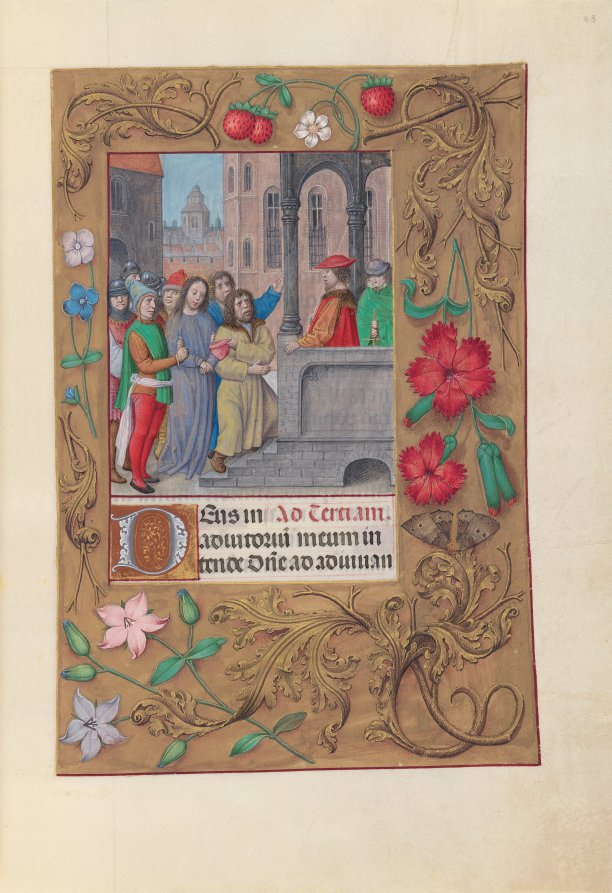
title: Hours of Queen Isabella the Catholic, Queen of Spain: Fol. 63r, Christ before Pilate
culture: Flanders, Ghent and Bruges, late 15th century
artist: Master of the First Prayerbook of Maximillian (Flemish, c. 1444–1519)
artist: and Associates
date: c. 1500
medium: ink, tempera, and gold on vellum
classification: Bound Volume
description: This manuscript was illuminated by a circle of at least five highly organized manuscript painters active in the Flemish cities of Ghent and Bruges. The principal illuminator was Alexander Bening, who painted the majority of the book's miniatures. Manuscripts produced by this circle of artists are renowned for the decoration of their borders, which typically feature a rich variety of realistically-painted flowers, birds, and butterflies. This prayer book, called a book of hours, was intended not for a cleric, but for the private devotions of a lay person-in this case, Isabella the Catholic, Queen of Spain (1451-1504). Isabella's coat of arms embellishes the book's frontispiece. It is unlikely that the book was commissioned by the Queen herself; rather, she probably received it as a diplomatic gift from someone courting her patronage, perhaps Cardinal Francisco Jimenez de Cisneros. A Franciscan friar, Jimenez was dependent upon Isabella for his advancement, first to the post of Queen's confessor in 1492, and then to Archbishop of Toledo in 1495.